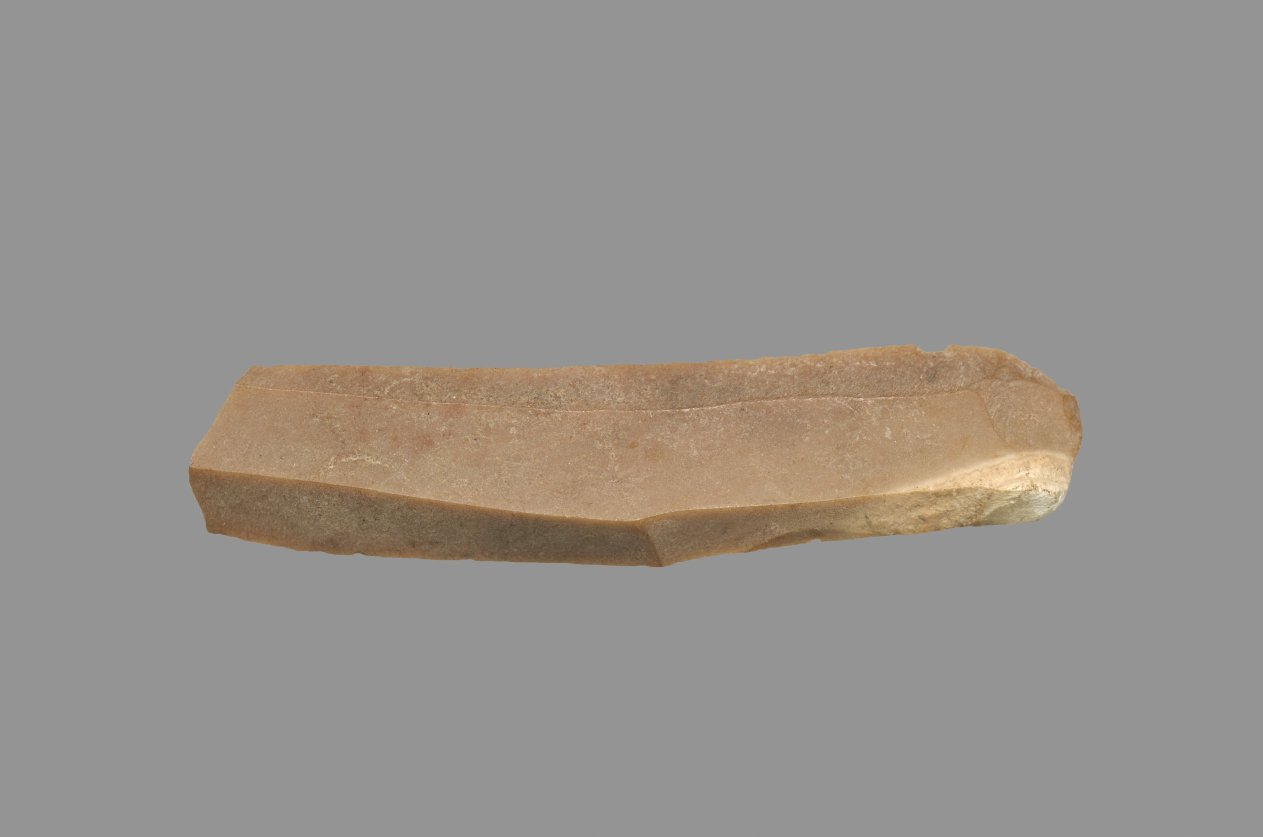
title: Sickle Blade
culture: Egypt, Middle Kingdom (2040–1648 BCE), Dynasty 12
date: 1980–1801 BCE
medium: flint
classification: Implements